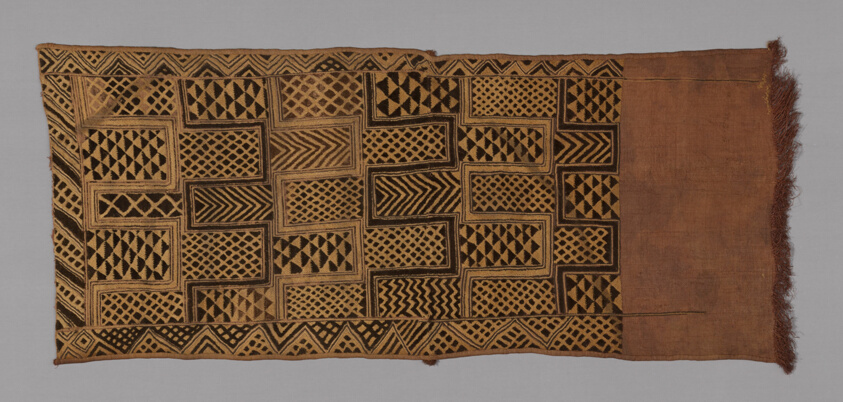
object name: Costume and Accessories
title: Woman's Overskirt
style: kuba (democratic republic of congo style, Arts of Africa, african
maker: Kuba, Shoowa; Democratic Republic of the Congo, Mushenge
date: 19th century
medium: Raffia, plain weave; embroidered in stem stitches and running stitches cut to form pile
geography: Democratic Republic of the Congo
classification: textile; needlework (visual works); arts of Africa; costume; dress (garment); clothing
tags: geometric, zigzags, chevrons, diamond shapes